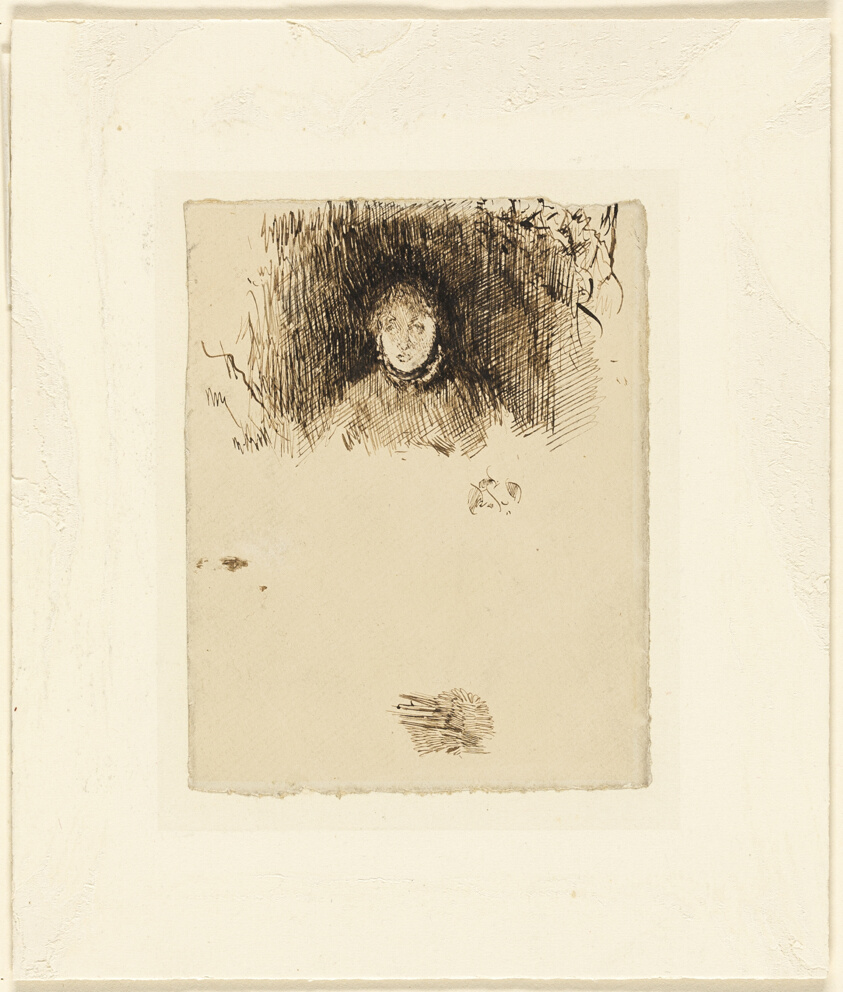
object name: Drawing and Watercolor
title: Head of a Girl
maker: James McNeill Whistler (American, 1834-1903)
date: c. 1882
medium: Pen and brown ink with scraping on cream laid paper laid down on ivory board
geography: United States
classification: pen and ink drawings; drawings (visual works); prints and drawing; paper